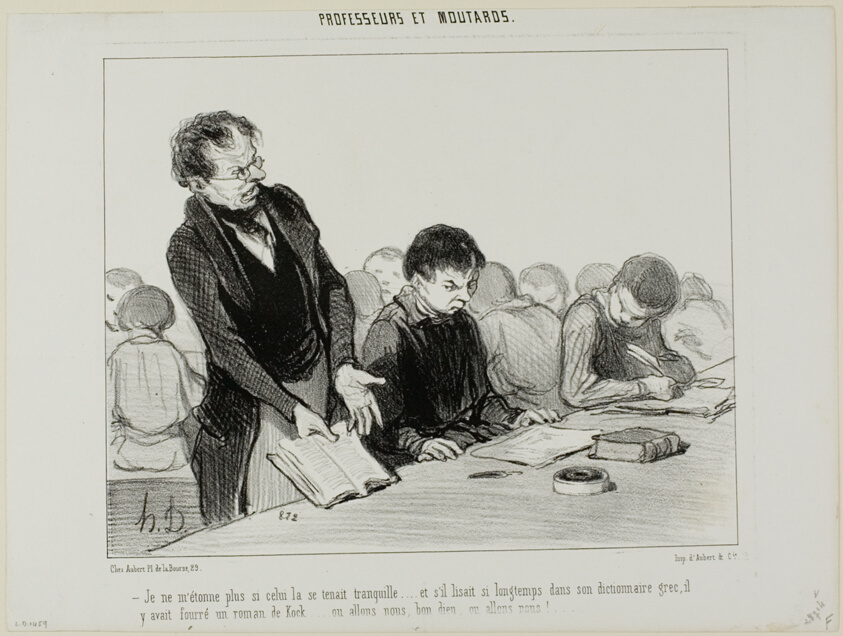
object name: Print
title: “- Now I understand why this chap was so quiet all the time..... instead of reading quietly in his Greek dictionary, he was indulging in a novel by de Kock.... Oh my God.... where is this all going to end!!,” plate 22 from Professeurs Et Moutards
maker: Honoré Victorin Daumier; French, 1808-1879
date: 1846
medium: Lithograph in black on white wove paper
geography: France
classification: lithograph; print; prints and drawing